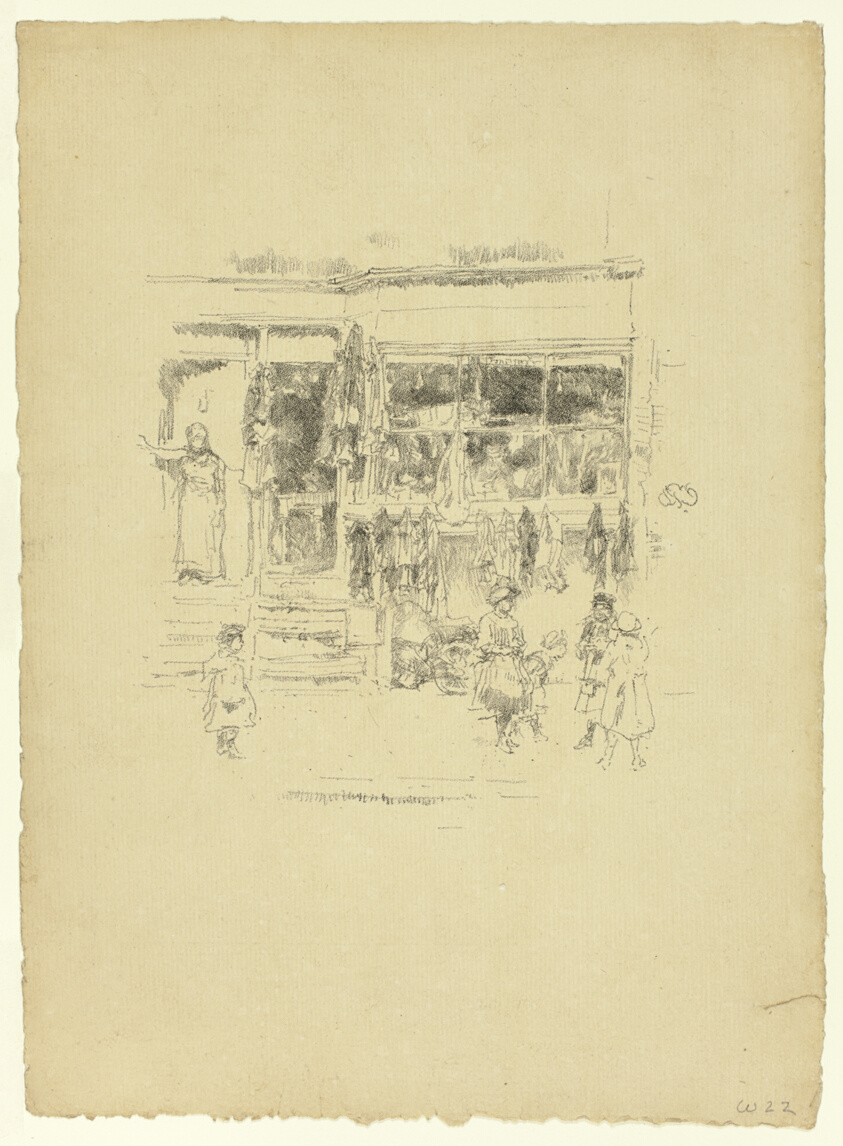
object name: Print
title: Chelsea Rags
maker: James McNeill Whistler (American, 1834-1903)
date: 1888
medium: Transfer lithograph in black on tan laid paper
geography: United States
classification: transfer lithograph; lithograph; print; prints and drawing; paper